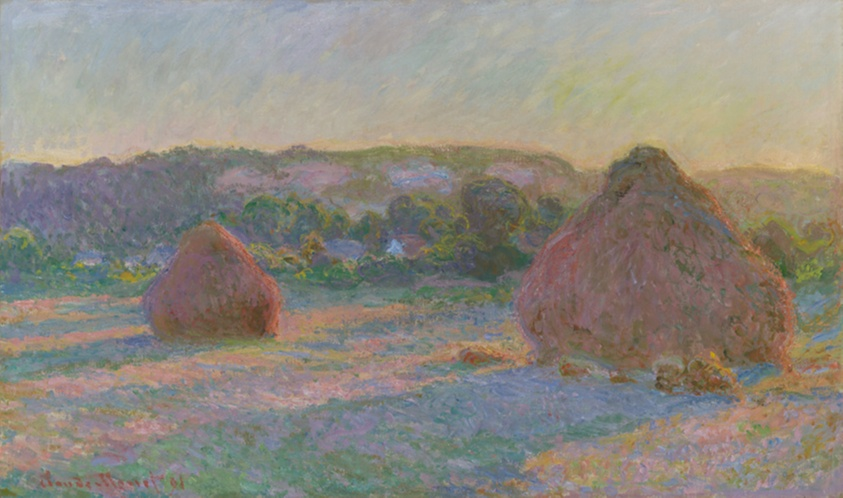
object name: Painting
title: Stacks of Wheat (End of Summer)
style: Impressionism, nineteenth century, 19th century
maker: Claude Monet (French, 1840–1926)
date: 1890–91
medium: Oil on canvas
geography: France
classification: oil on canvas; paint; oil paintings (visual works); french; painting; european painting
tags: seasons, nature, farm, trees, bushes, hills, building, pink (color), green (color), weather/seasons, landscapes, rural life, summer, wheat, farm life, farming